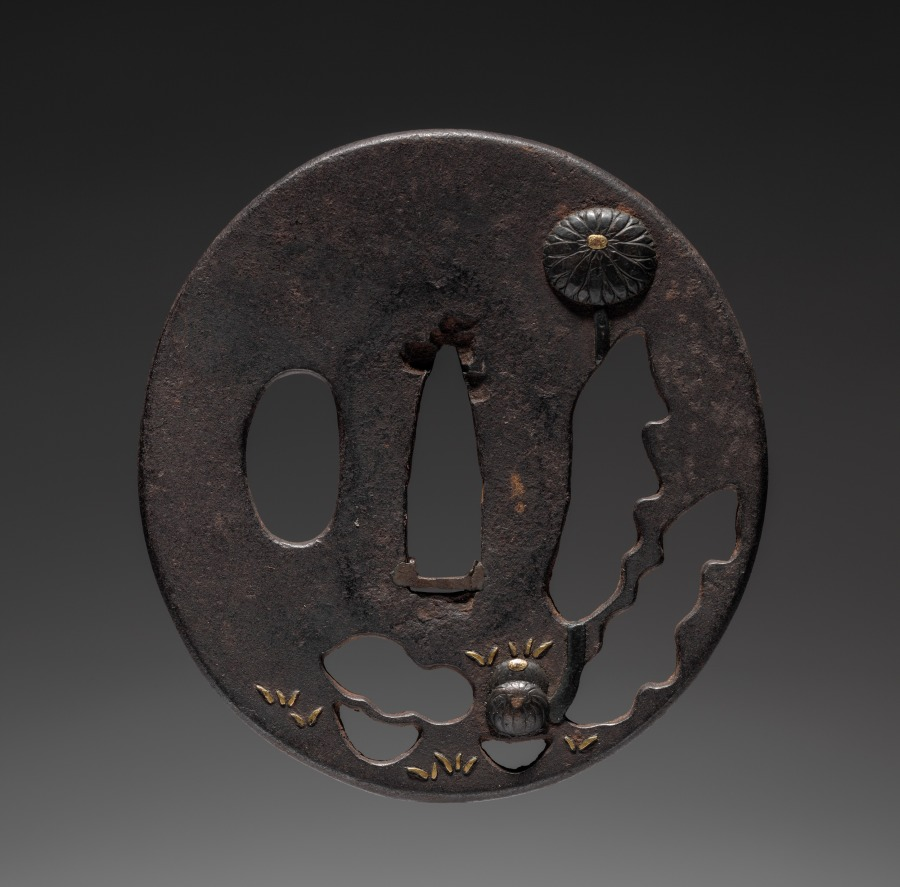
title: Sword Guard (Tsuba) with Dandelion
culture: Japan, possibly Edo period (1615-1868)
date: c. 1615–1868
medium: iron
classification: Arms and Armor